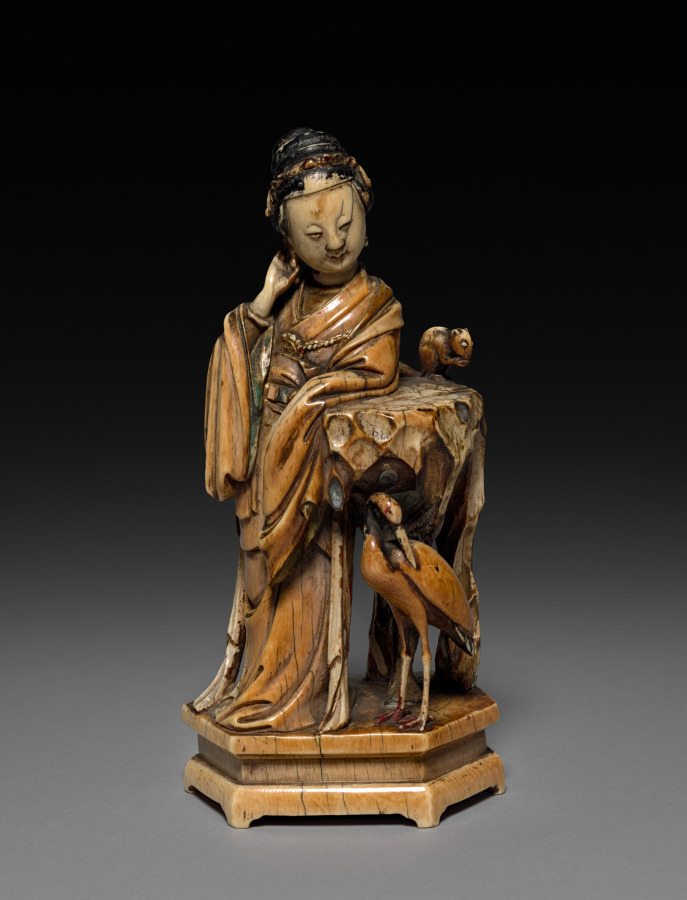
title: Female Figure with Crane and Squirrel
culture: China, Qing dynasty (1644-1911), Kangxi reign (1662-1722)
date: 1662–1722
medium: ivory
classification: Ivory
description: In the Qing dynasty (1644–1911), luxury items became more affordable to larger parts of the society, including women, merchants, and literati in non-official positions. Imperial patronage and a growing urban population encouraged consumption of luxury goods and local craftmanship. This ivory form of a woman with a crane illustrates the superb skills and the creative mind of the talented artisan who sought clients on a competitive market.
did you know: The ivory has aged to a rich amber, while traces of its original red and green paint remain on the woman’s cuffs and collar.